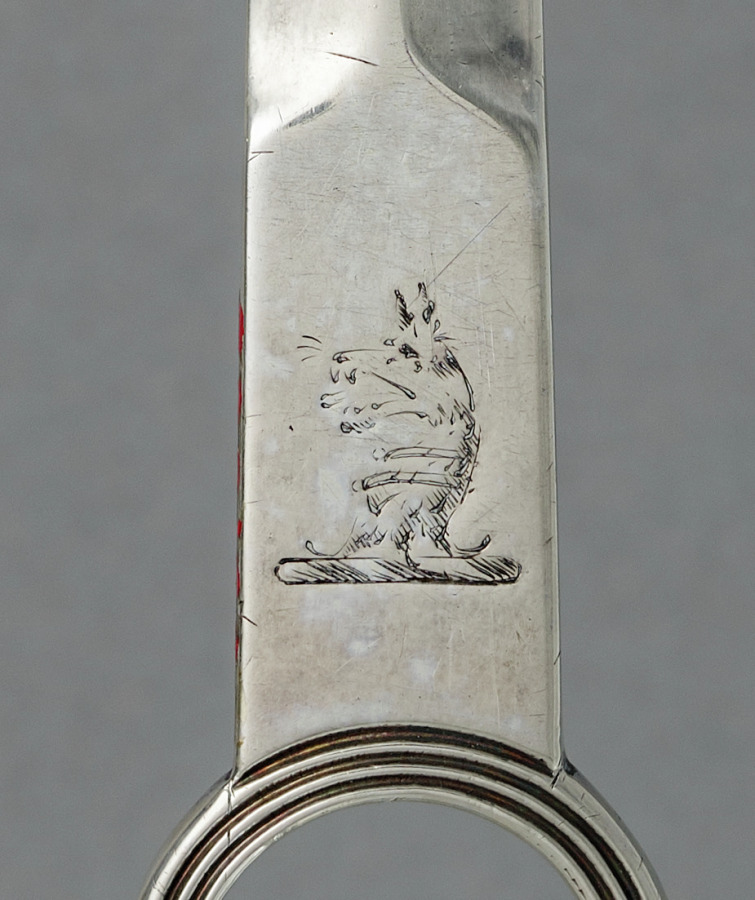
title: Skewer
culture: England, 19th century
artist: firm of William Eley (British)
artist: firm of William Fearn (British)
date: 1818–1819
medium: silver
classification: Silver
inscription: engraved crest on one side.